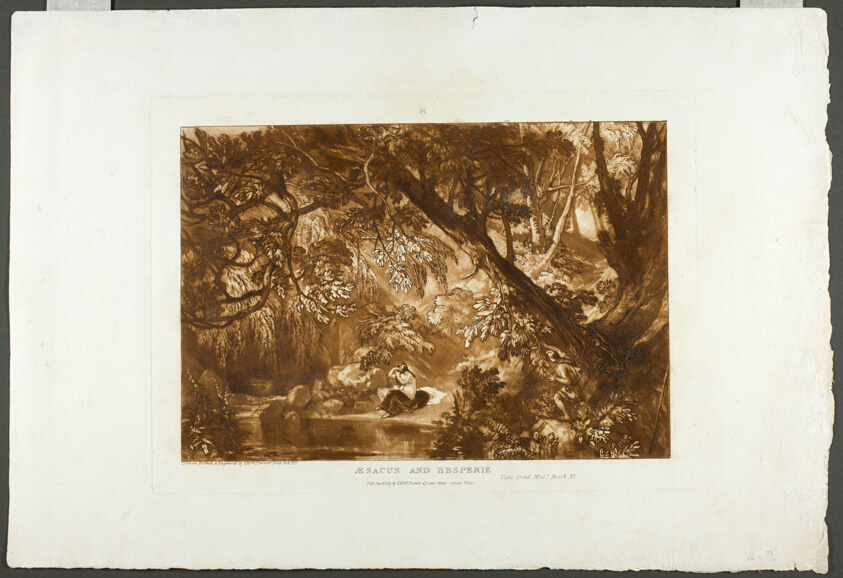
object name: Print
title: Aesacus and Hesperie, plate 66 from Liber Studiorum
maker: Joseph Mallord William Turner (English, 1775-1851)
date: January 1, 1819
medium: Etching and aquatint in brown on ivory laid paper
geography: England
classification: etching; print; prints and drawing